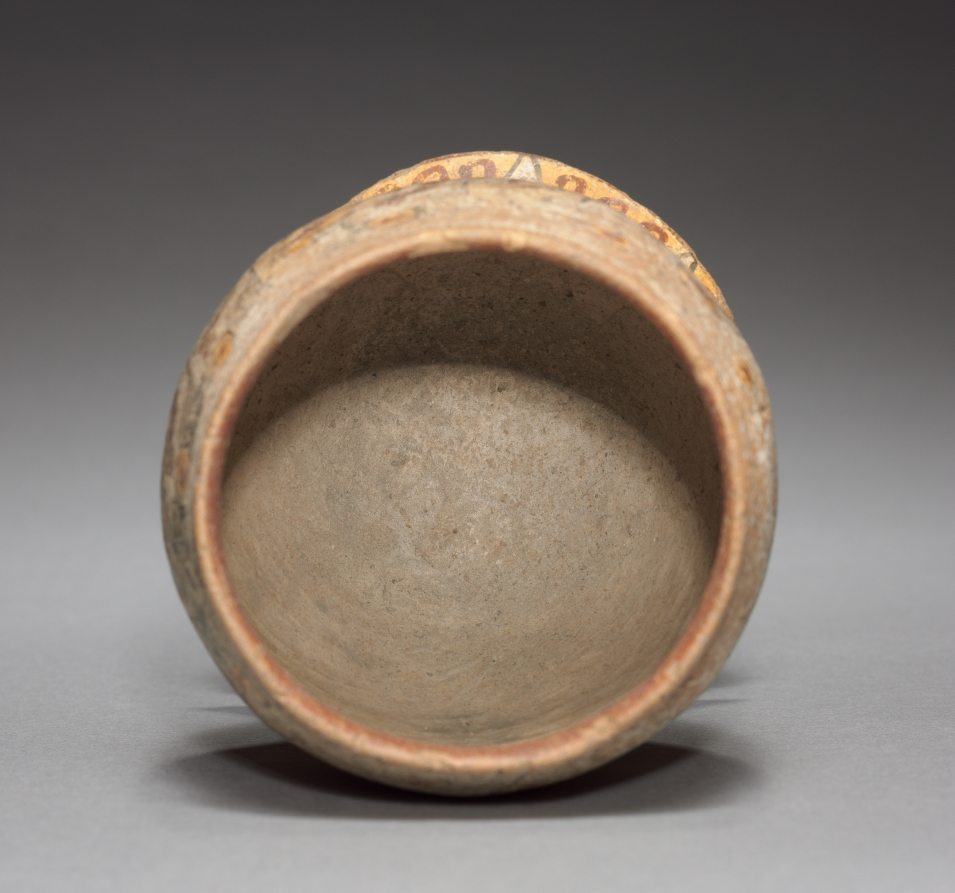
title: Drinking Cup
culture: Mexico, Cholula(?), Mixteca-Puebla style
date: 900–1519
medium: pottery with burnished, colored slips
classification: Sculpture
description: After about the year 800, several Mixtec kingdoms developed in the regions known today as Oaxaca and Puebla in southern Mexico. Mixtec artists excelled in creating small-scale, fine works of art, including polychrome pottery. A Mixtec noble may have used this well-painted goblet to drink chocolate or pulque, a fermented beverage made from the sap of the maguey cactus.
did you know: Pulque, once the drink of gods and rulers, is now available in a can.